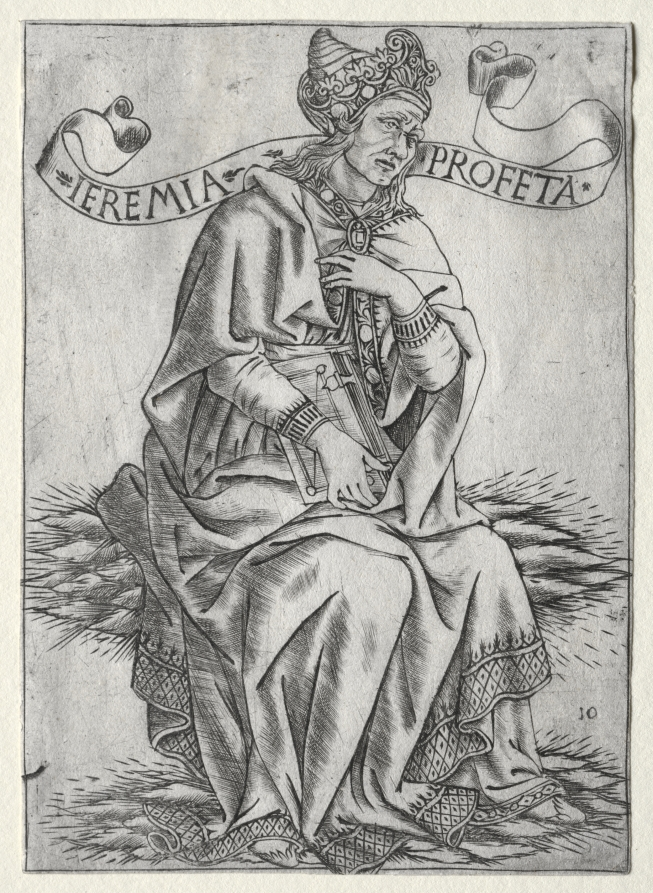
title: The Prophets: Jeremiah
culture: Italy, Florence, 15th century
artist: Baccio Baldini (Italian, c. 1436–1487)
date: c. 1470–75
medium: engraving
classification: Print